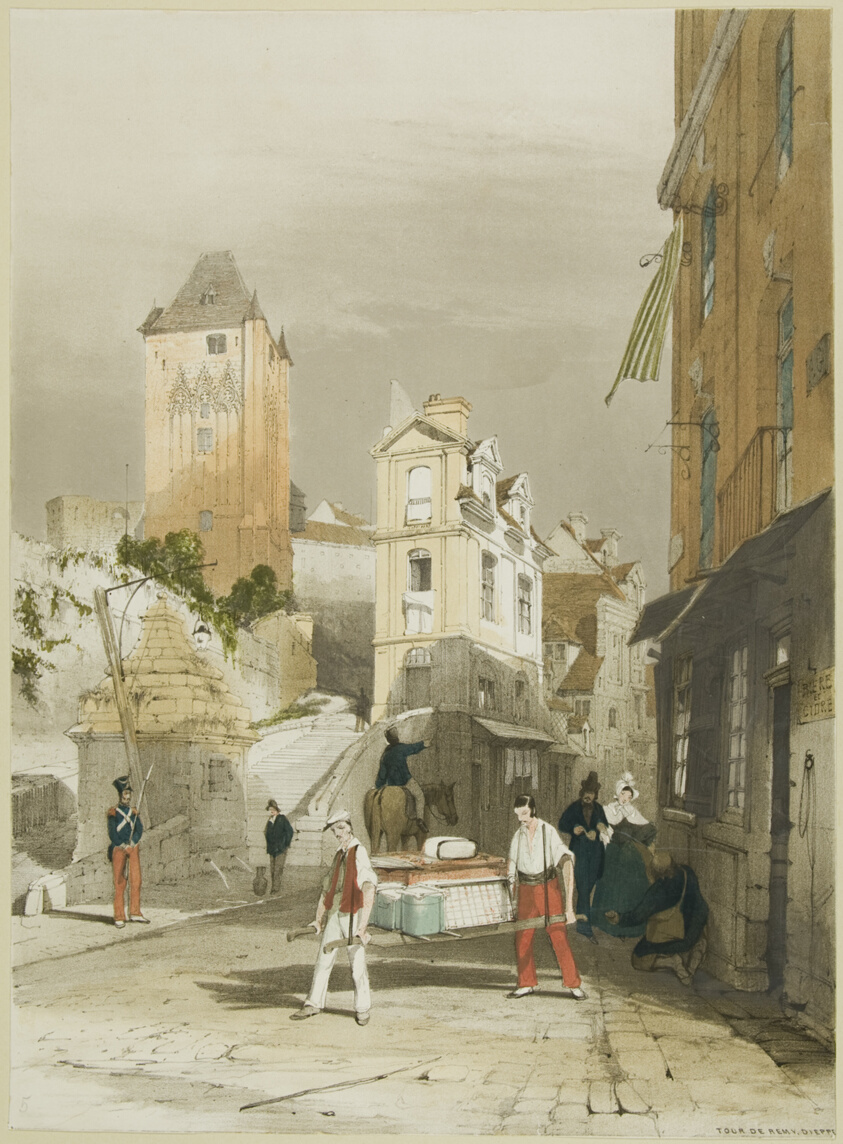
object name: Print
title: Picturesque Architecture in Paris, Ghent, Antwerp, Touen, etc.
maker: Thomas Shotter Boys (English, 1803-1874); published by Charles Joseph Hullmandel (English, 1789-1850)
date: 1839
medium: Color lithograph on paper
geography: England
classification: lithograph; print; prints and drawing